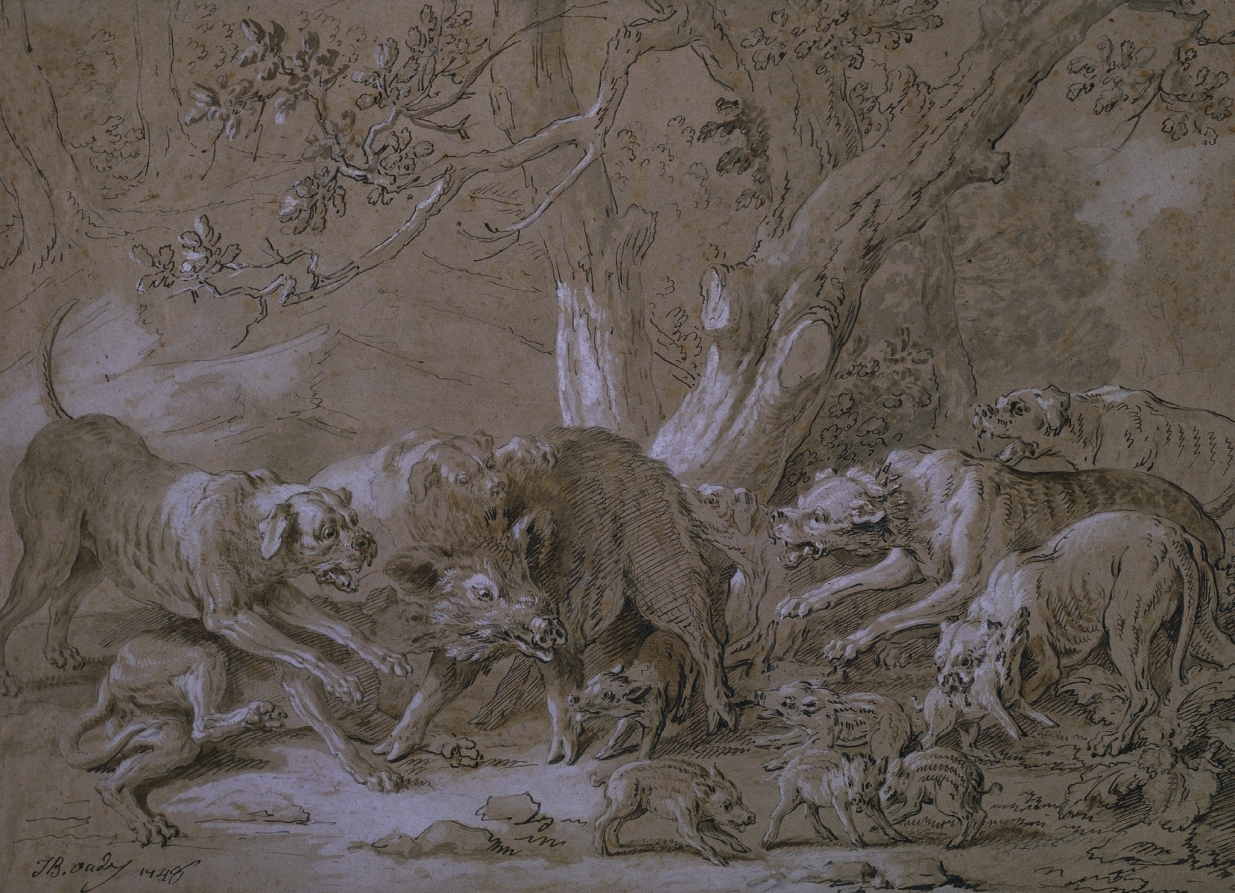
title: Wild Sow and Her Young Attacked by Dogs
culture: France, 18th century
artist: Jean-Baptiste Oudry (French, 1686–1755)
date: 1748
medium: Pen and brown and gray ink, brown and gray wash, heightened with white gouache on light brown laid paper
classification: Drawing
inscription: signd, lower left, in brown ink: JB. Oudry 1748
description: Jean-Baptiste Oudry began his career as a portraitist but gradually became known for his paintings of animals and hunting scenes. These images attracted the attention of Louis XV, and Oudry became one of France's foremost decorative painters during the king's reign. Here, the artist highlighted a violent battle between a sow and a group of dogs. The drawing relates to one of Oudry's most successful Salon paintings, which was exhibited to great acclaim in 1748. The sketchy lines and lack of detail throughout the sheet suggest that it was likely a study made in preparation for the later canvas, which was purchased by Louis XV and installed in one of his homes.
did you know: Though Oudry was a prolific draftsman, he purposely kept his drawings during his lifetime, hoping that they would be an asset for his heirs after his death.